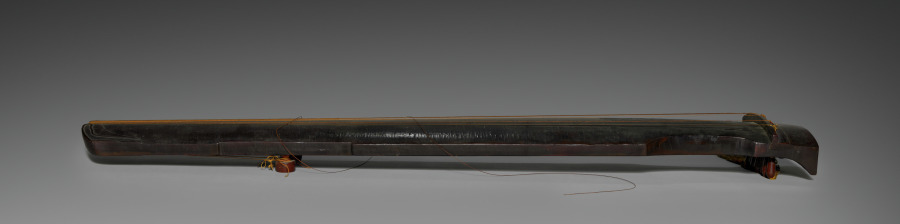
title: Guqin made by Zhang Ruixiu of Suzhou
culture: China, Ming dynasty (1368–1644)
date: 1584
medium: Seven-string Asian long zither, chordophone, made from wood, lacquer, mother of pearl, and silk strings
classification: Musical Instrument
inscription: 為海虞天池先生重斲/ 萬曆甲申古吳張睿脩得古桐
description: China’s most prestigious instrument, the guqin can be traced to the Chu culture almost 2500 years ago. By the late Ming dynasty, Jiangnan was a center of high-end guqin production. Coated in black lacquer, this elegantly crafted instrument is inscribed on the inside, stating it was made by Zhang Ruixiu of Suzhou for Mr. Tianchi of Haiyu, also known as Yan Cheng (1547–1625). Yan was a key figure in guqin music history and founder of the Yushan school in Suzhou. Zhang Ruixiu was a guqin maker, known for achieving a supreme tone quality. Ten instruments attributed to him are known, of which this guqin has the earliest date.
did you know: The 13 studs in mother-of-pearl inlay indicate finger positions for sounding harmonics.